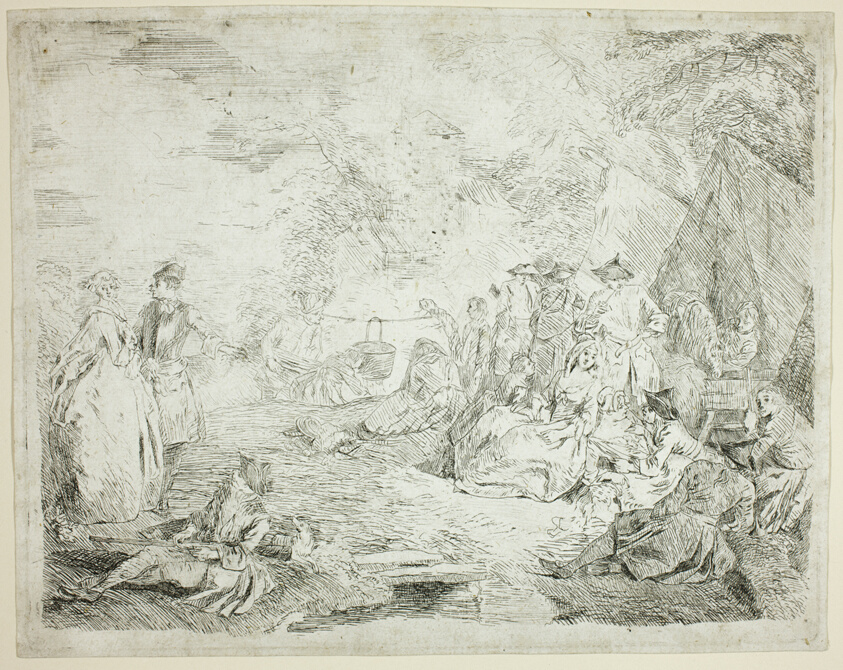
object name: Print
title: Troops Resting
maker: Jean-Baptiste Pater (French, 1695-1736)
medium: Etching on ivory laid paper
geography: France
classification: etching; print; prints and drawing